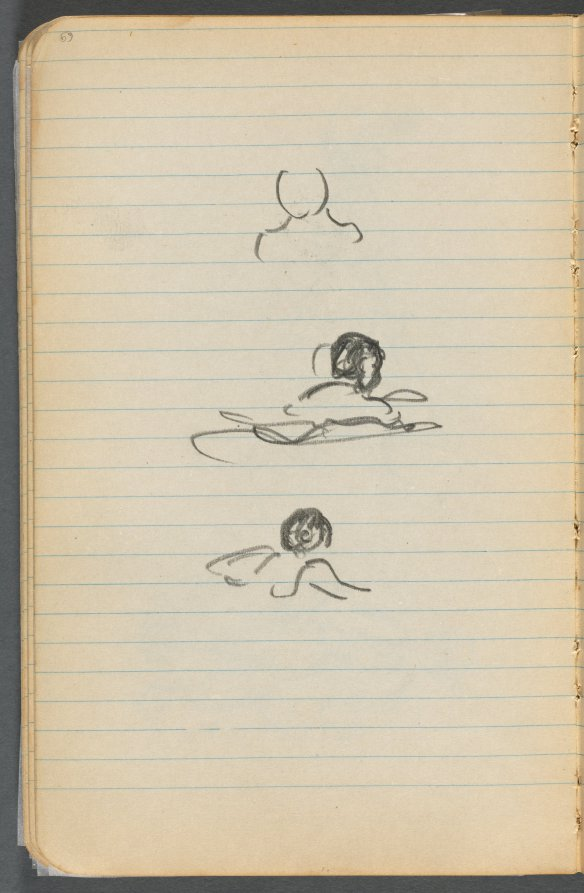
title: Sketchbook, page 069: Figures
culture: America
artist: Maurice Prendergast (American, born Newfoundland [now Canada], 1858–1924)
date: 1905–10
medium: graphite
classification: Bound Volume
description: This sketchbook contains 69 pages of drawings, a diary largely devoted to the state of the artist's health, and a three-page discourse on the nature of genius and ideas.